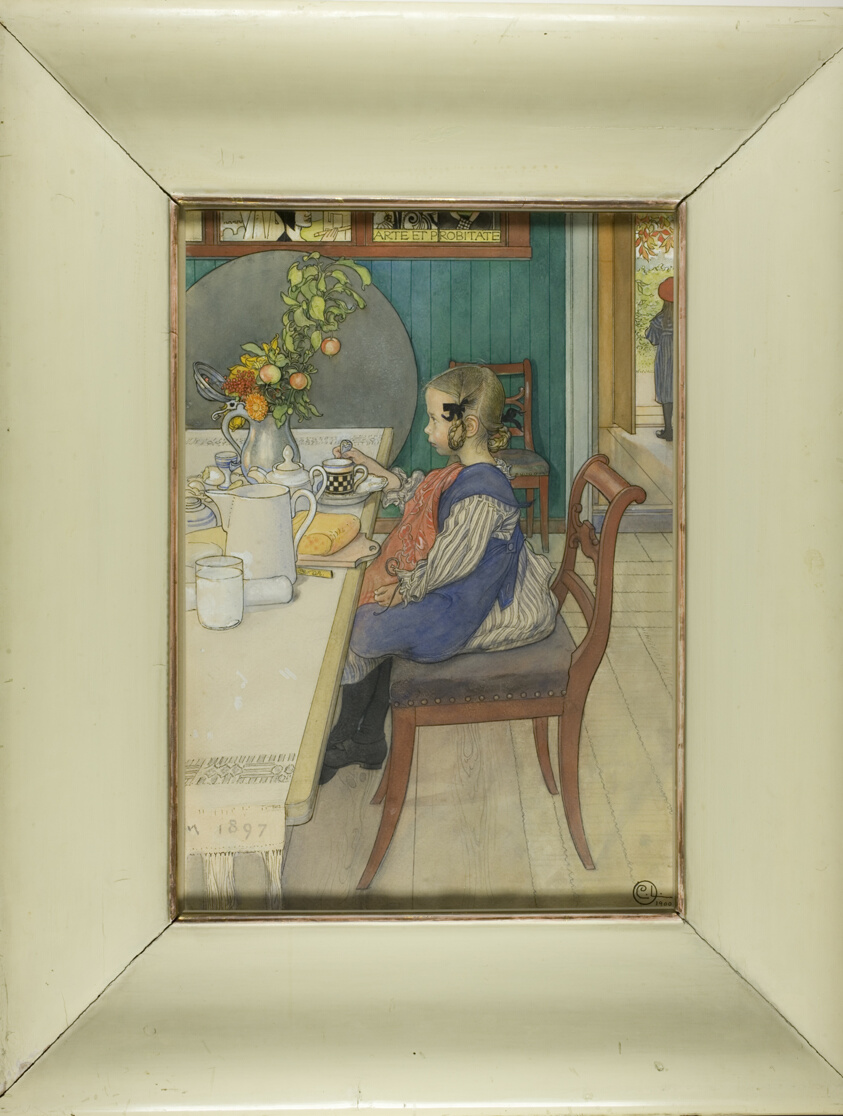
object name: Drawing and Watercolor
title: Little Lie-A-Bed's Sad Breakfast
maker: Carl Olof Larsson (Swedish, 1853-1919)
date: 1900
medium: Watercolor over graphite on paper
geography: Sweden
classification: watercolor; drawings (visual works); prints and drawing